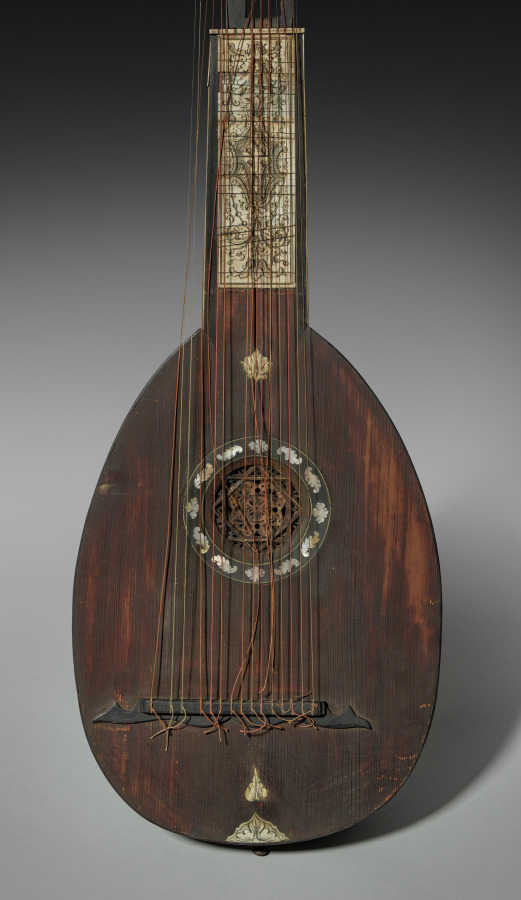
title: Chitarrone (or Archlute)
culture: Italy, Rome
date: late 1600s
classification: Musical Instrument